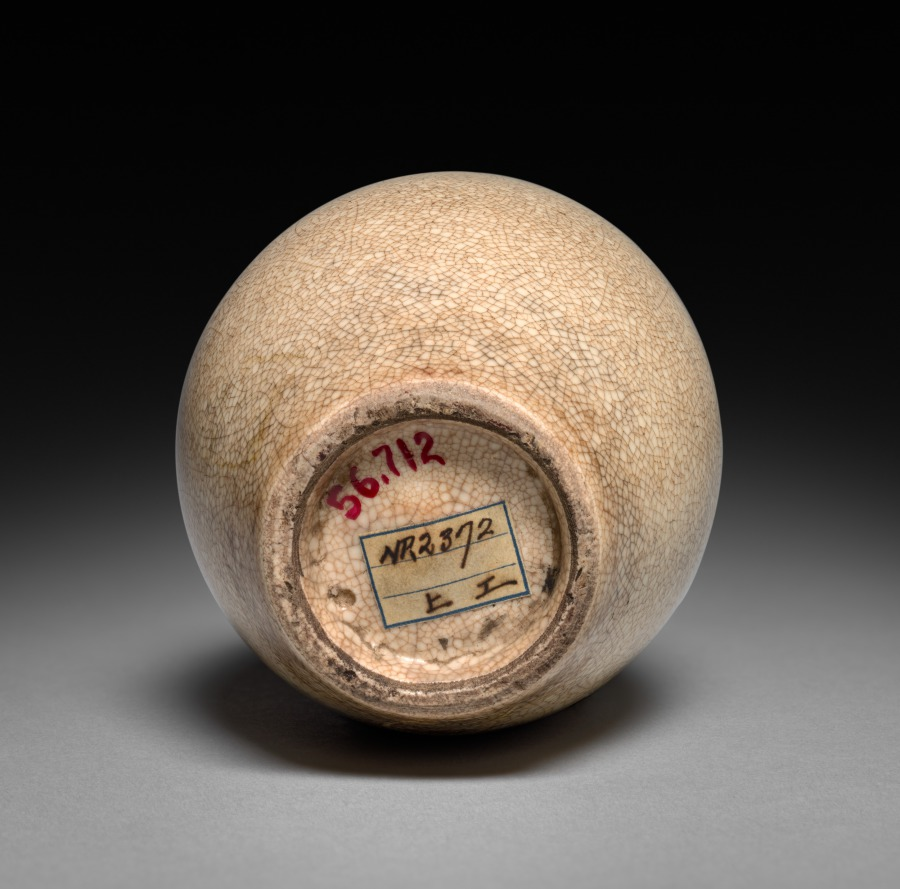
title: Vase: Dhong-ke Ware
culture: China, Ming dynasty (1368–1644)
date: 1368–1644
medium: white crackled stoneware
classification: Ceramic